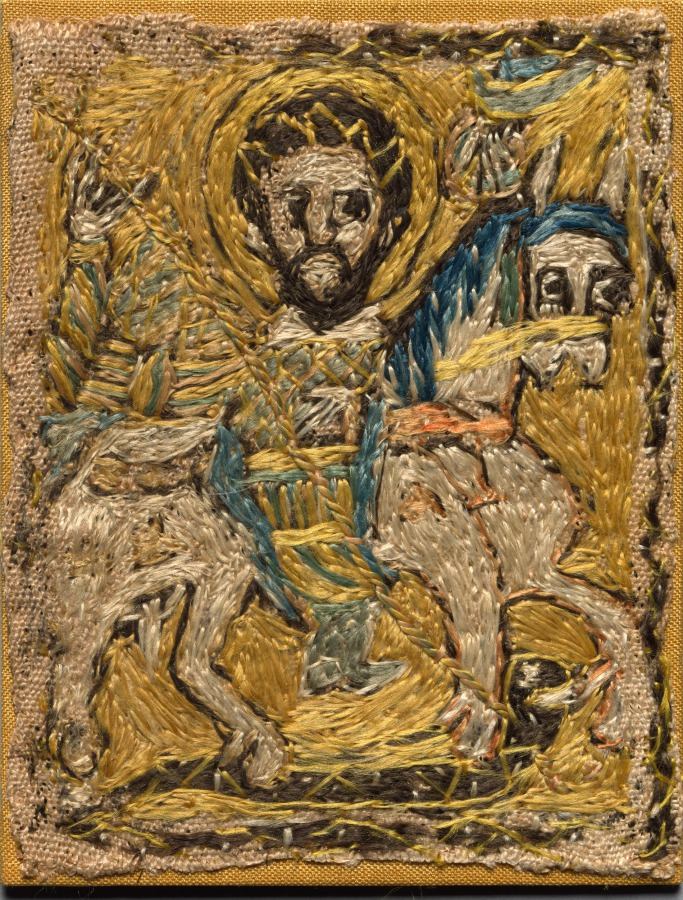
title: Fragment of a Clavus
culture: Egypt, Abbasid period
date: late 700s–early 800s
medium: embroidery on tabby weave: silk and linen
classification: Embroidery